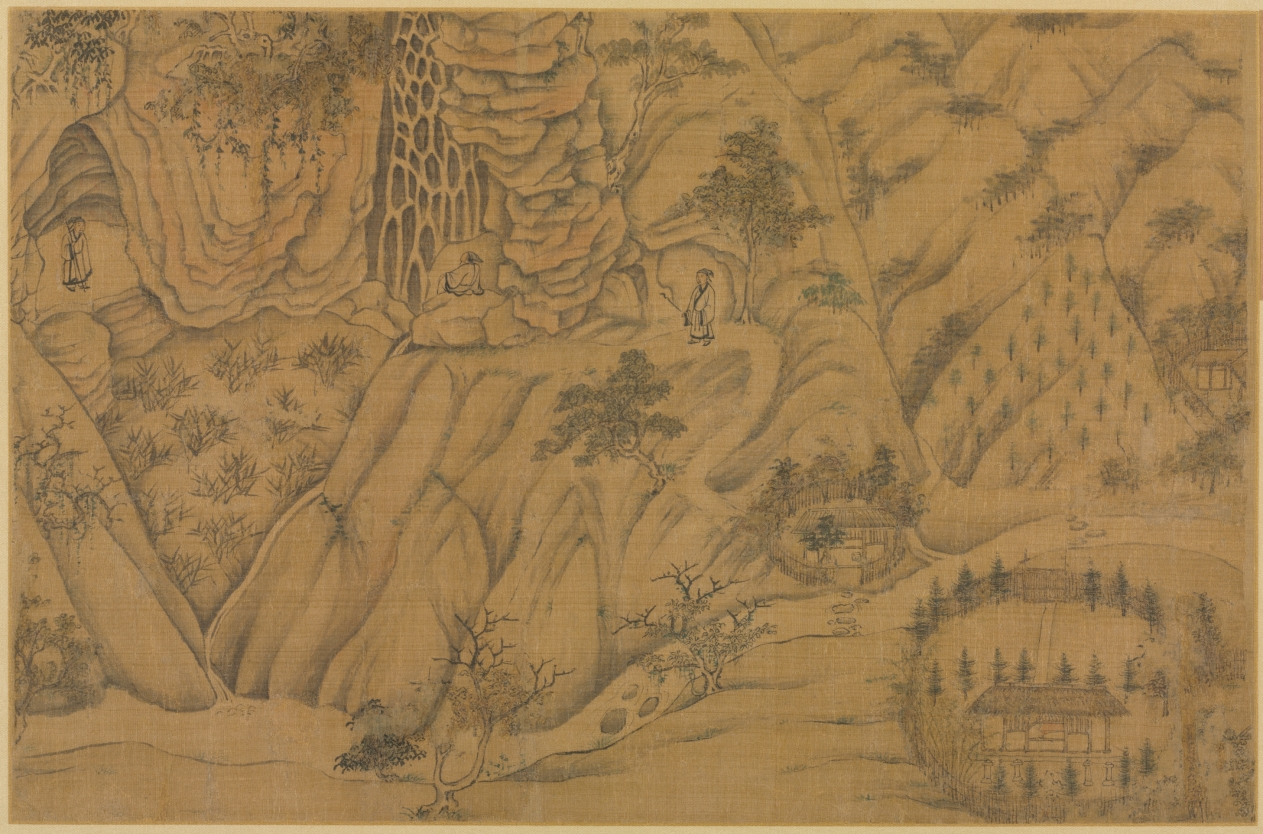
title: Dwelling in the Longmian ("Sleeping Dragon") Mountains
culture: China, Song dynasty (960-1279) - Yuan dynasty (1271-1368)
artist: follower of Li Gonglin (Chinese, c. 1049–1106)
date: 1100s-1200s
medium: handscroll mounted as an album leaf; ink and color on silk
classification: Painting